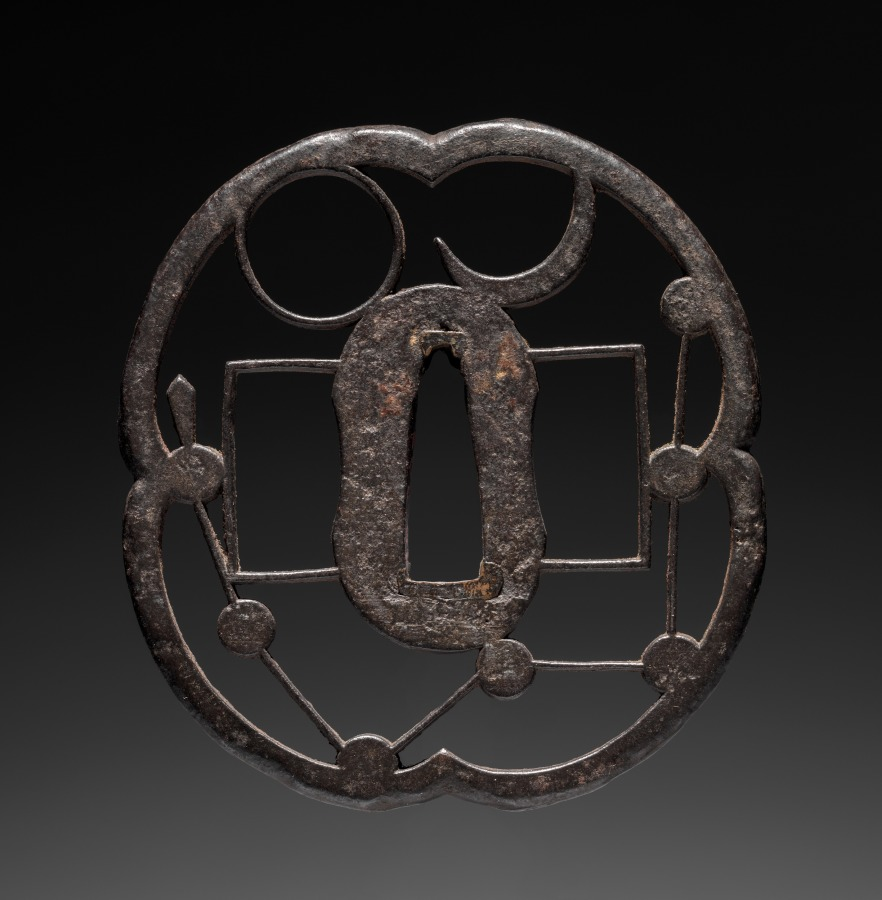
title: Sword Guard (Tsuba) with Sun, Moon, and Northern Dipper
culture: Japan, possibly Edo period (1615-1868)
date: c. 1615–1868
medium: iron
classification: Arms and Armor